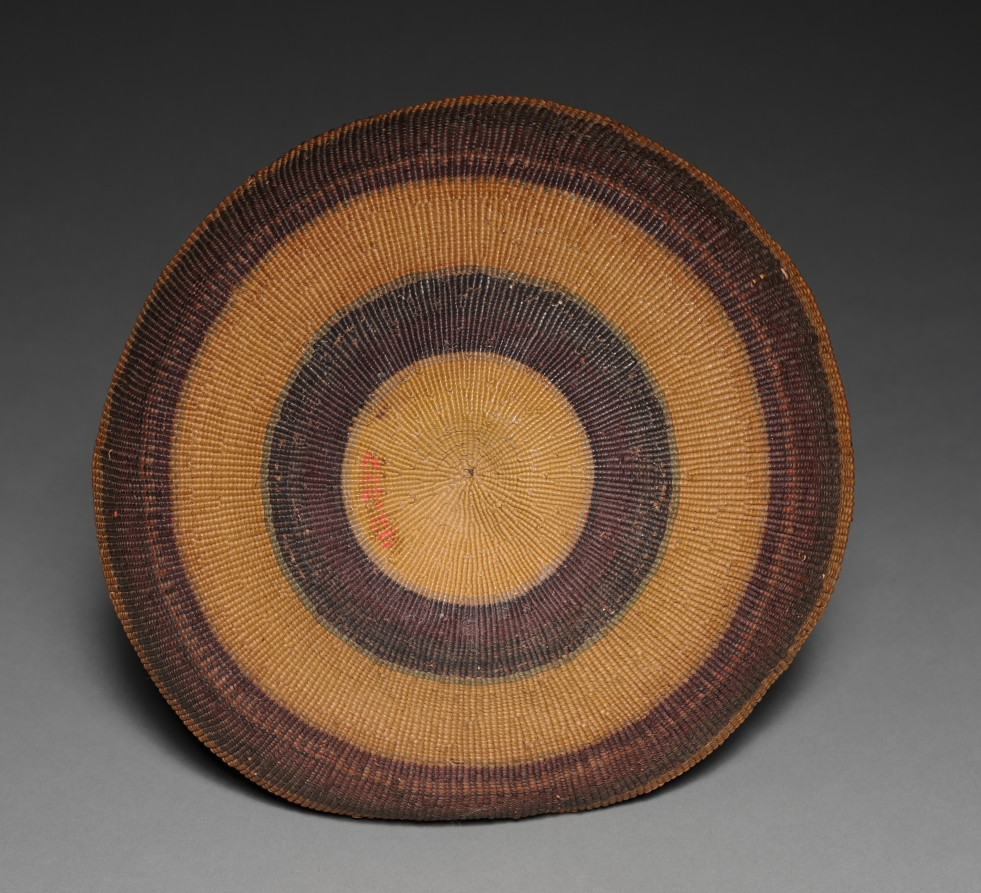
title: Tray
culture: Northwest Coast, Tlingit, late 19th century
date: late 1800's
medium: Spruce root, Beach grass; twined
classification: Basketry